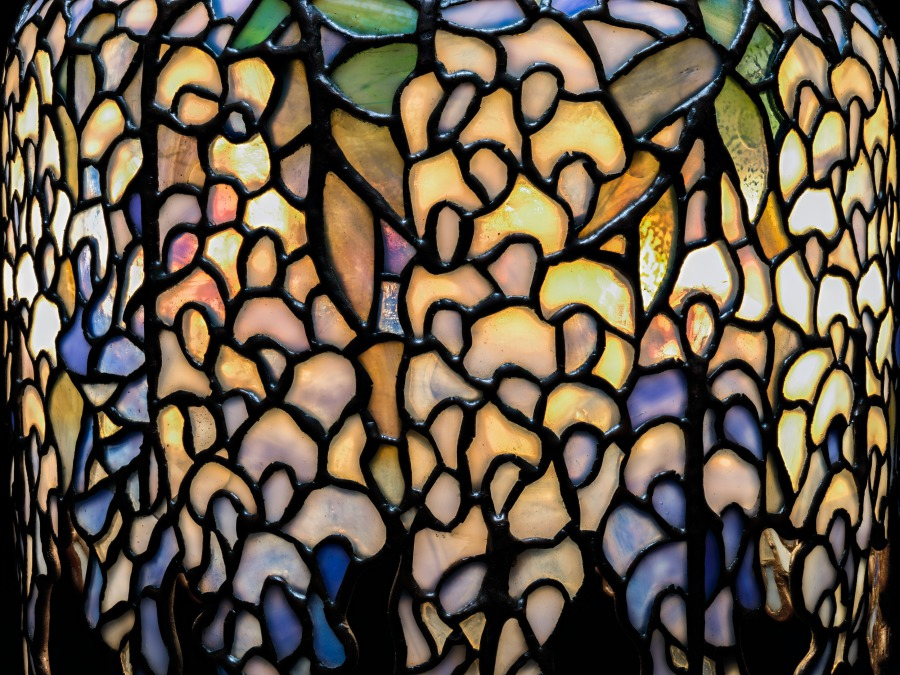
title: "Pony" Wisteria Lamp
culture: America, New York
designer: Clara Wolcott Driscoll (American, 1861–1944)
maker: Tiffany Studios (United States, New York, 1902–32)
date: c. 1902–10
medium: leaded glass, bronze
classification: Lamp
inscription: Base impressed: TIFFANY STUDIOS/NEW YORK/7002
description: The dawn of the 20th century spurred fresh approaches to design. Louis Comfort Tiffany’s great contribution to this new art movement, termed the Art Nouveau, was not only the shimmering iridescence of his Favrile glass but also the naturalistic compositions of his lamps and windows, which brought him commercial and critical success in both Europe and America. The artistic blend of sculpture and function in the Wisteria lamp, in which the base rises up to form the branches of the vine, became a hallmark of Tiffany's Art Nouveau production. This lamp, designed by Clara Wolcott Driscoll, Tiffany's chief lamp designer, won a grand prize for Tiffany Studios at the 1902 international exposition in Turin, Italy.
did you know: This small version of the Wisteria Lamp was called a "pony" by Tiffany and his artisans.